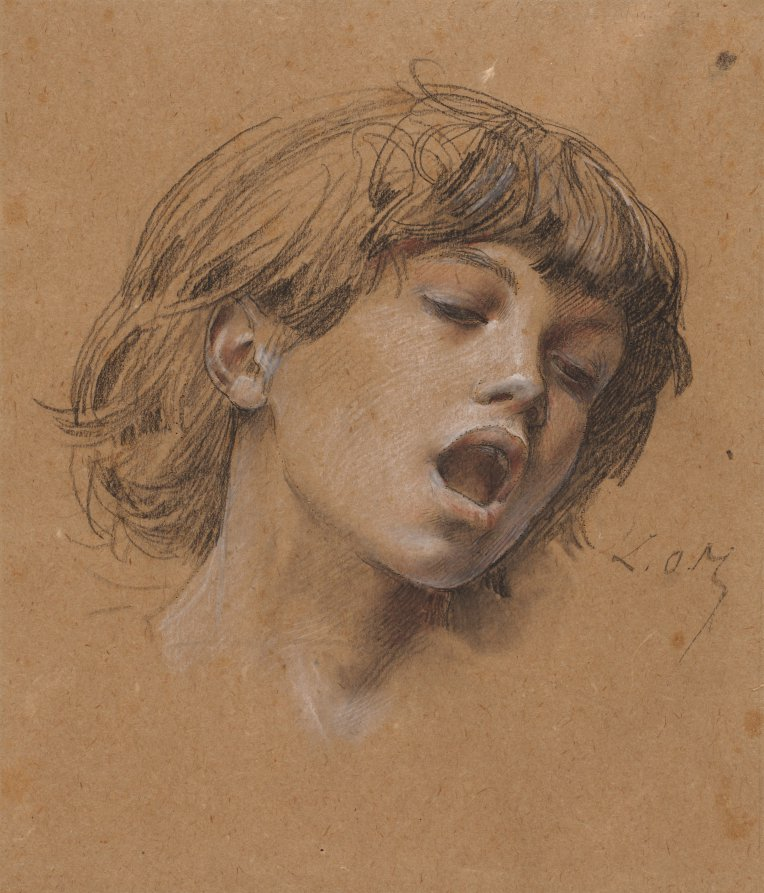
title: Head of a Boy Singing (Study for Music)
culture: France, 19th century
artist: Luc-Olivier Merson (French, 1846–1920)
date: c. 1898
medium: black, white, and red chalk with stumping, pricked for transfer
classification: Drawing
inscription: signed, center right, in black chalk: L. O. M; lower left, in graphite: 33 40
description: This sheet was a preparatory study for the face of a singing boy who appears near the center of Music, a mural decorating the left grand staircase at the Théâtre National de l’Opéra-Comique in Paris. Drawn from life with exquisite naturalism, Luc-Olivier Merson captured the sitter’s youthful beauty with such clarity that the purity of the boy’s voice seems to emanate from the drawing.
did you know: The face of the boy in this drawing is pricked extensively so that the image could be transferred directly to the final painting for which it was a study. The two works differ only in the addition of a hat on the boy's head in the final work.